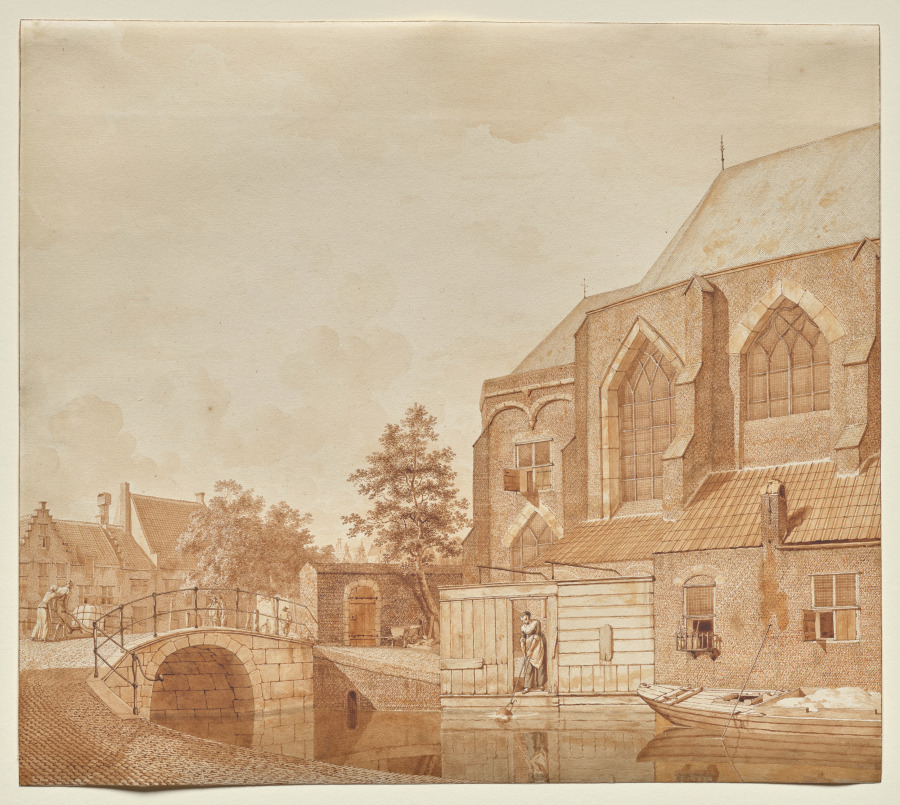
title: A View of the Nieuwe Kerk, Delft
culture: Netherlands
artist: Johannes Huibert Prins (Dutch, 1757–1806)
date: 1793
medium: Brush, point of brush and brown ink and wash with traces of graphite on cream medium-weight wove paper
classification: Drawing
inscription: Brown ink stamp, verso, lower right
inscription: Written in pencil on verso: "[illegible]"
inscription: Written in brown ink on verso: "A?u de Niewe Kerk le (?) Delft van de agtenzede le zieu/F.H. Prins ad viv del 1793"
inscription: Written in pencil on verso: "[illegible/illegible]"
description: Johannes Huibert Prins made small-scale works on paper such as this drawing featuring scenes of Dutch cities and the people who inhabited them going about their everyday lives. In this drawing, the large Nieuwe Kerk (New Church) in the city of Delft is shown from the side, while a matron fills a bucket for washing from the canal and laborers and other urban inhabitants cross the bridge beyond. Prins's technique, based on that of the artist Jan van der Heyden who worked about 100 years earlier, relied on minute detail—down to the mortar between each brick—achieved with astounding control of the ink and wash.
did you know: On the bridge a laborer pushes a heavy parcel on a wheelbarrow aided by a woman who pushes him from behind.